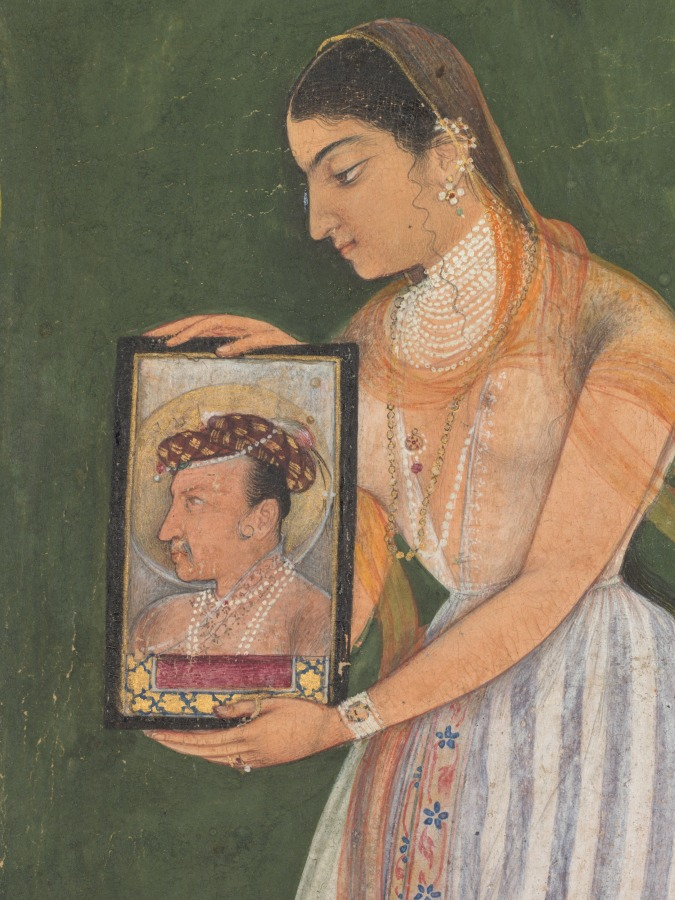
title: Nur Jahan holding a portrait of Emperor Jahangir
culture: Mughal India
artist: attributed to Bishandas (Indian)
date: c. 1627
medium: gum tempera and gold on paper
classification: Painting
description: A woman identified as the favorite wife of the Mughal emperor Jahangir (reigned 1605–27) holds a formal portrait of her husband. He appears aged with graying facial hair behind the jharokha carpet that marks imperial presence. This painting may be modeled on a work depicting Jahangir holding a portrait of his deceased father, showing himself to be the legitimate successor. Nur Jahan, who handled most of the affairs of state, hoped to remain in power after his death. She is depicted in her idealized youth, since she would have been 50 years old when Jahangir died.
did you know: Jahangir died at 58, outliving his younger brothers by about 25 years.